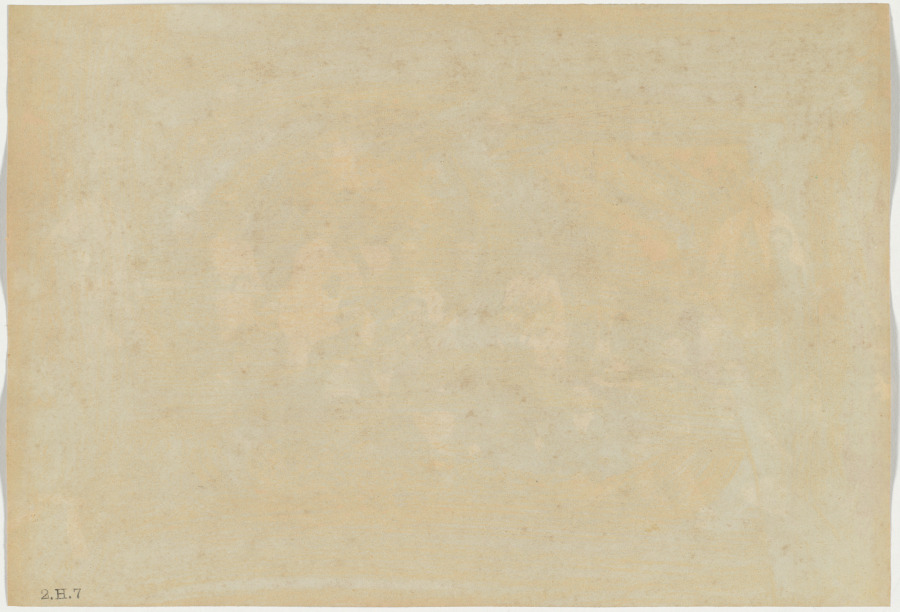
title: Picnic Party at Mr. Peliti's Country House, Mashobra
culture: India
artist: Raja Deen Dayal (Indian, 1844–1905)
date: 1887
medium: albumen print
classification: Photograph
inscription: Stamped in black ink on verso: “2.H.7”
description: This scene is from one of many lavish entertainments hosted by local caterer, restaurateur, and hotelier Federico Peliti (Italian, 1844–1914) at his forested country estate outside Shimla. In the photograph, Peliti is on horseback and his wife Judith is on the swing. Swings have a long history as items of leisurely pleasure in Europe and India. Badminton, which originated in England in 1873, was popular in India. Deen Dayal may have been invited to document this gathering because he and Peliti, an amateur photographer, both belonged to the Photographic Society of Bombay.